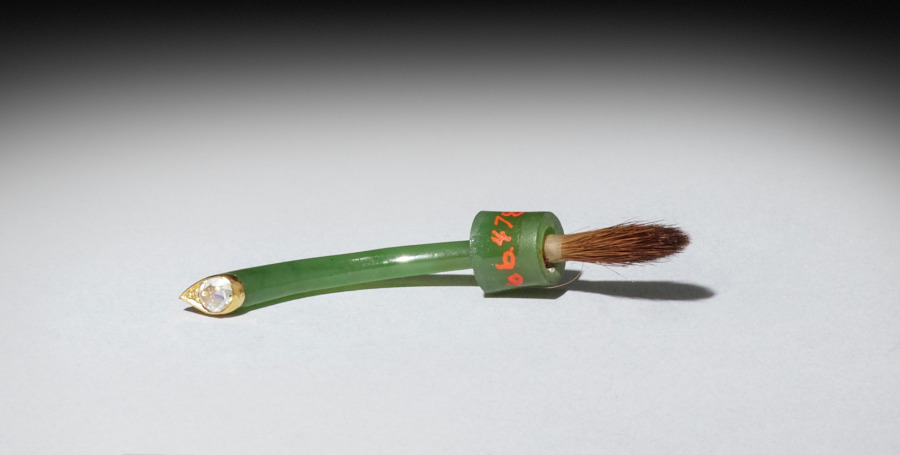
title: Stamp Moistener (Stem)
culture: Russia, St. Petersburg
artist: firm of Peter Carl Fabergé (Russian, 1846–1920)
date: late 1800s-early 1900s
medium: jade, diamonds, gold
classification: Miscellaneous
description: This stamp moistener in the form of a green tomato is carved out of a single piece of jade. The stem, tipped by a diamond mounted in gold, is removable. The interior end of this stem holds the brush that is used to wet a stamp for letters.